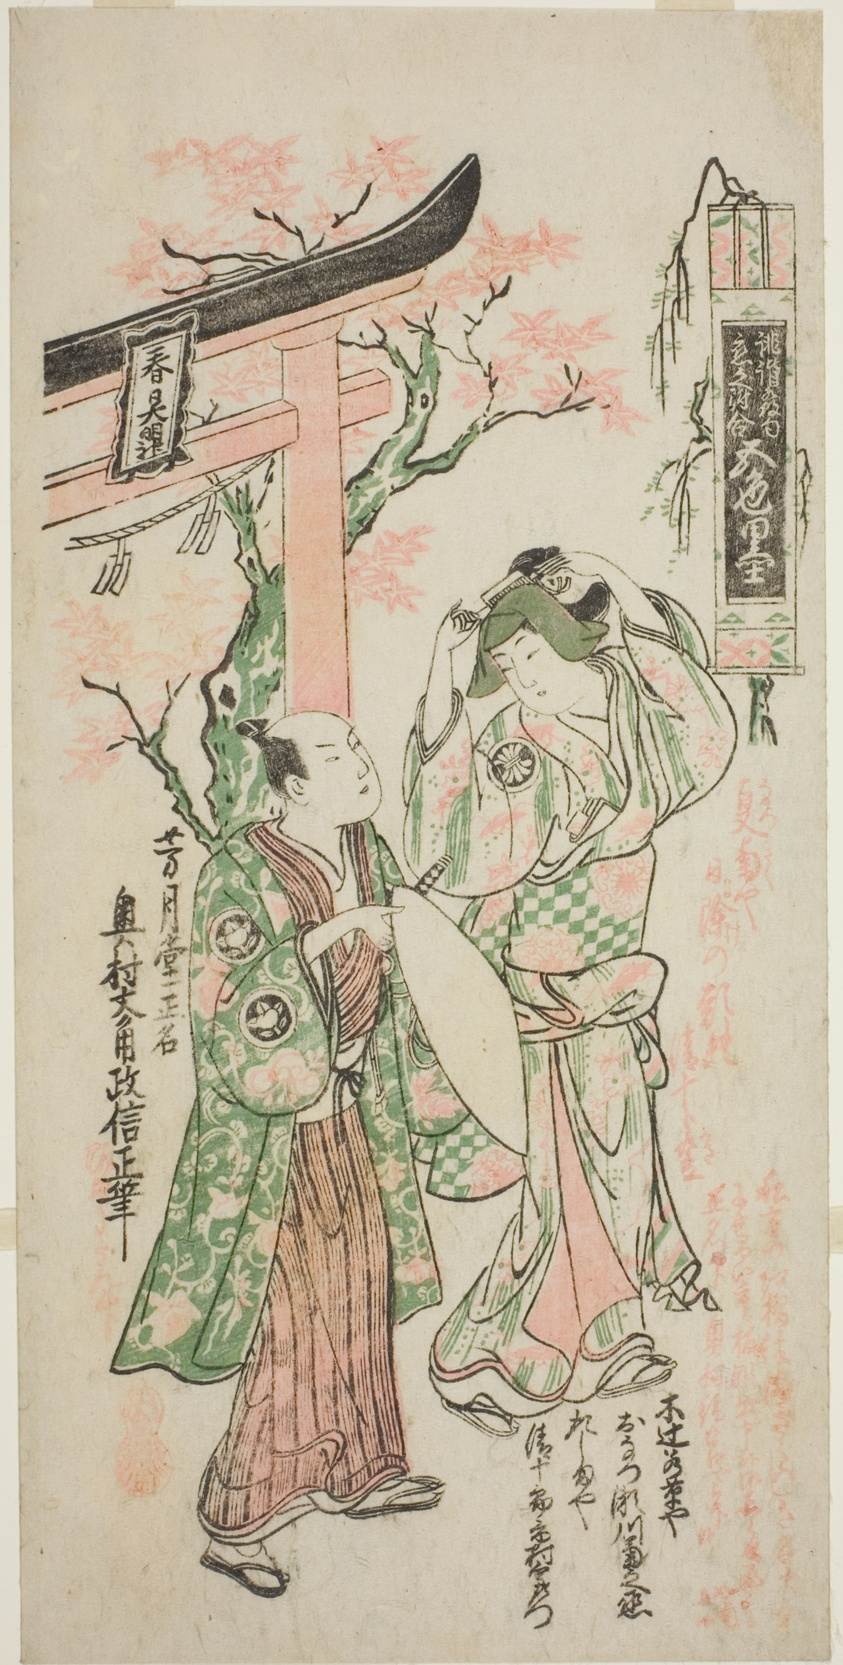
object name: Print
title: The Actors Segawa Kikunojo I as Onatsu and Ichimura Uzaemon VIII as Seijuro in the play "Uno Hana Nisei no Aikago," performed at the Ichimura Theater in the fourth month, 1747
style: Japanese (culture or style)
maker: Okumura Masanobu (Japanese, 1686-1764)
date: 1747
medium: Color woodblock print; hosoban, benizuri-e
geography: Japan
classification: woodblock print; print; asian art